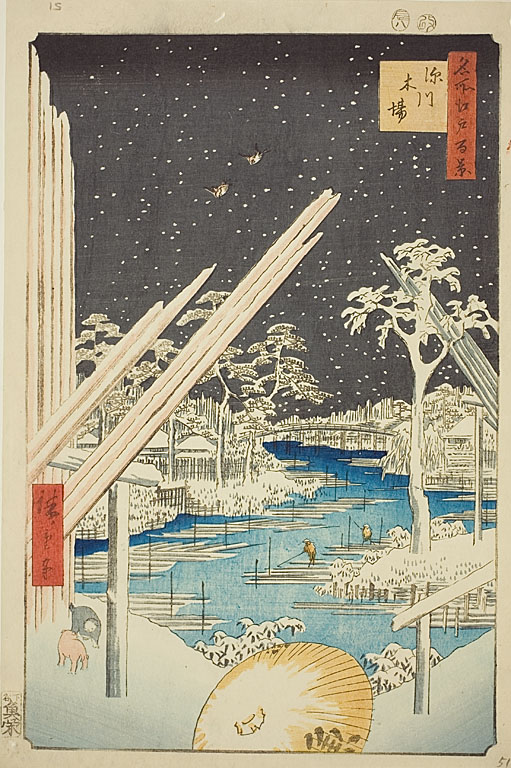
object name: Print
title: Lumberyards at Fukagawa (Fukagawa kiba), with dark sky, No.106 from the series “One Hundred Famous Views of Edo (Meisho Edo hyakkei)”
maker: Utagawa Hiroshige (Japanese, 1797-1858)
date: 1856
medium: Color woodblock print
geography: Japan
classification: woodblock print; print; asian art